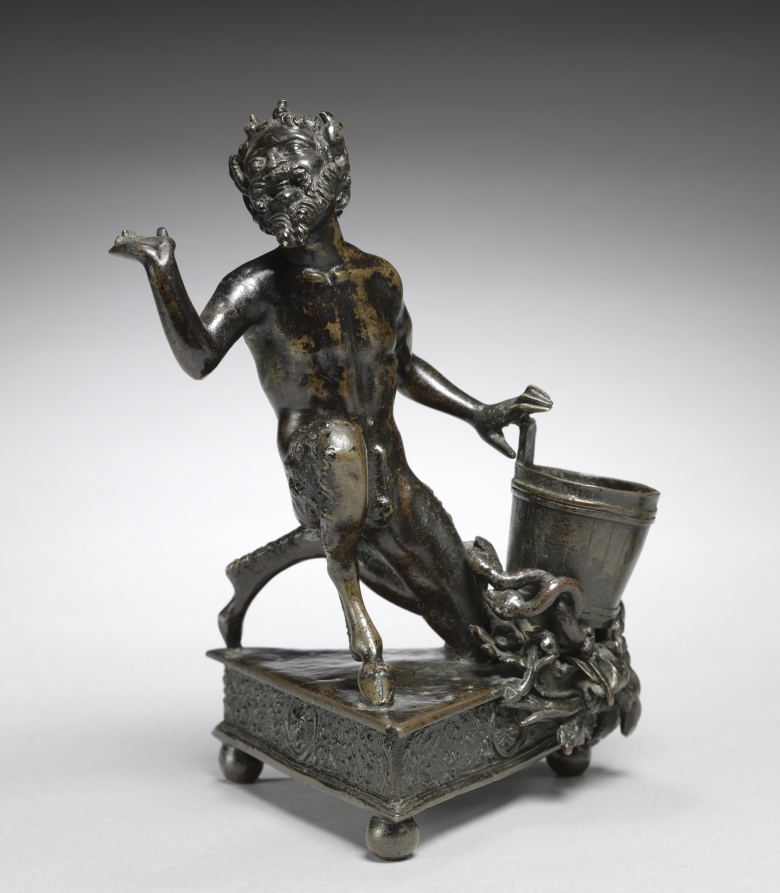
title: Kneeling Satyr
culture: Italy, Ravenna, 16th century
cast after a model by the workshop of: Severo da Ravenna (Italian, c.1496–c.1543)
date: c. 1520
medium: bronze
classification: Sculpture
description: Greek and Roman art and literature typically used satyrs as a form of grotesque comic relief, but Renaissance artists adopted them as jovial celebratory figures of nature and revelry.